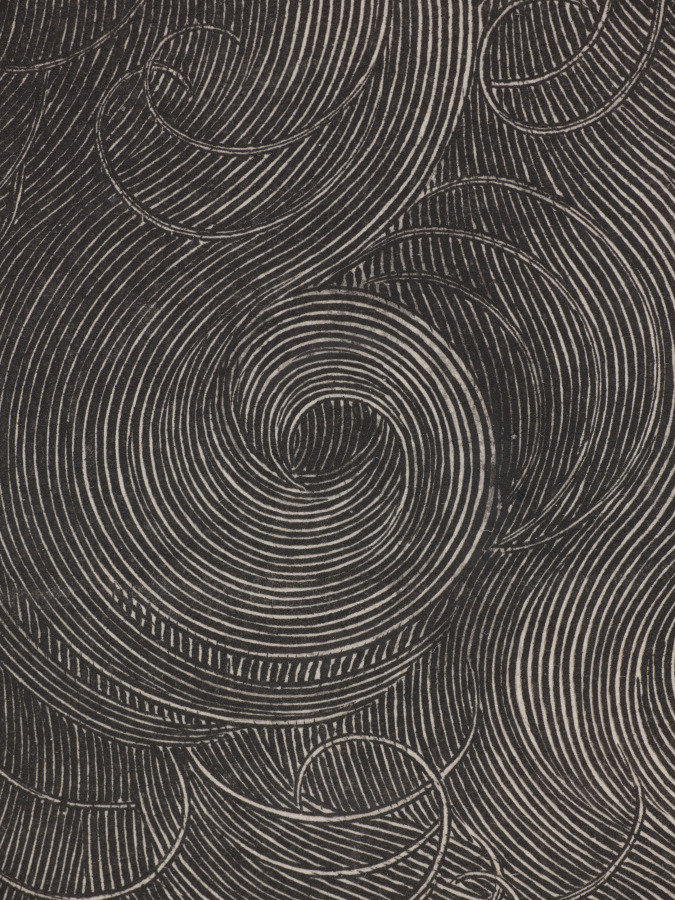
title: Louis XIV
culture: France, 17th century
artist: Robert Nanteuil (French, 1623–1678)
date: 1664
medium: engraving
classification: Print